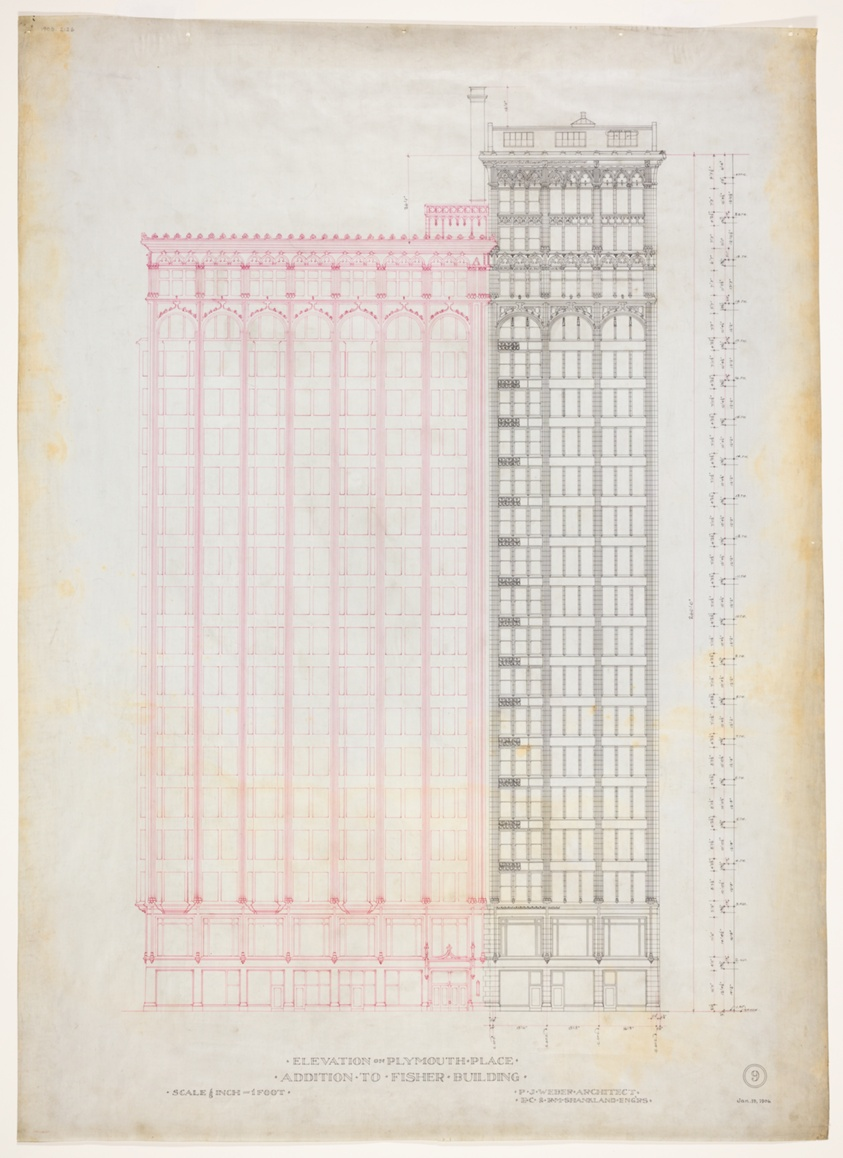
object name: Architectural Drawing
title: Fisher Building Addition, Chicago, Illinois, Elevation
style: 19th century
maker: Peter Joseph Weber (American, 1863-1923); Howells & Stokes (American, Unknown); P J Weber (American, Chicago, born 19th Cen - d. 20th Cen); Lord & Hewlett (American, act. 1920s)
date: 1890 1904.; 1913–1914.; 1893.; 1901; 1917.; 1917–1918; c.1917; 1914.; 1911–1913.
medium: Black and red ink on linen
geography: Chicago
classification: architecture; architectural drawing; elevation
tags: buildings, urban planning, drawing, design, architecture, elevation, illinois, Chicago